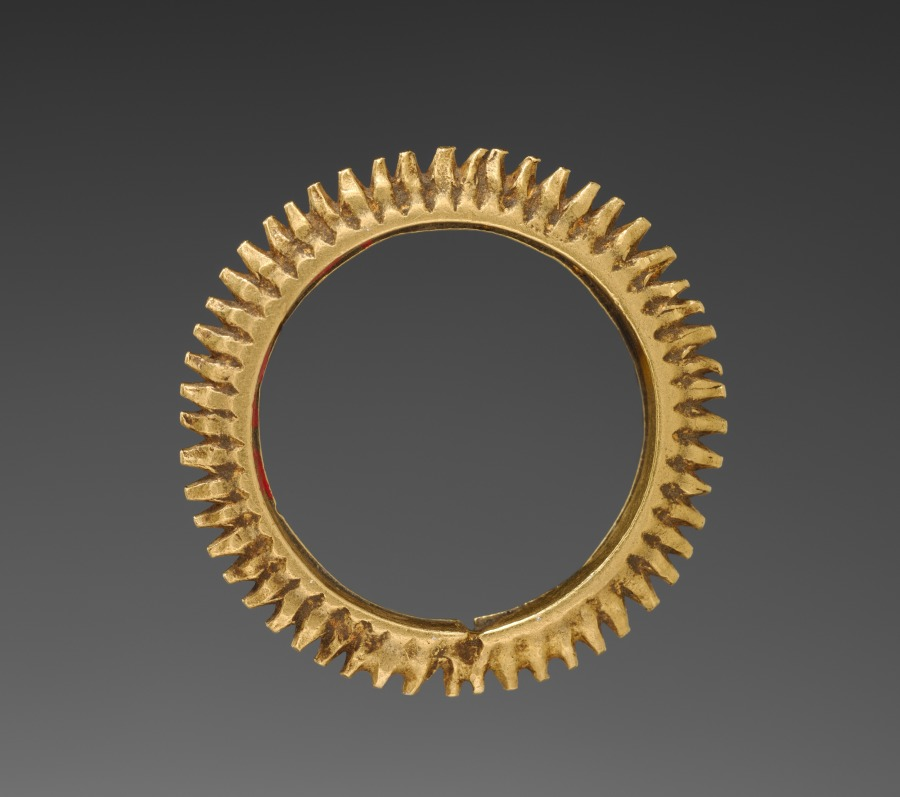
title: Ring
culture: India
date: 1800s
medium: silver gilt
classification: Jewelry